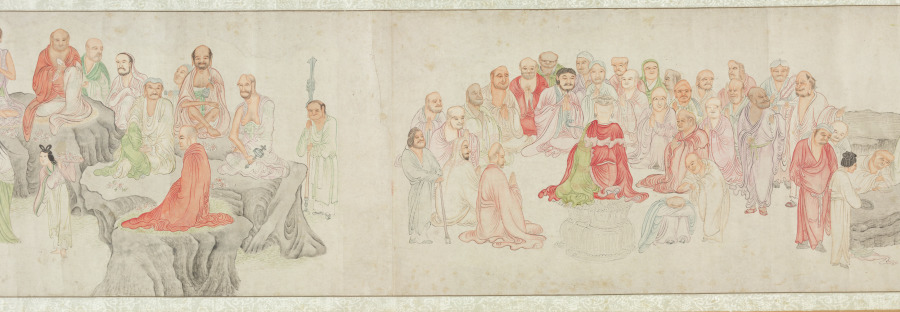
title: The Five Hundred Arhats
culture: China, Ming dynasty (1368–1644)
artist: Wu Bin (Chinese, active c. 1591–1626)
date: 1591–1626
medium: Handscroll; ink and color on paper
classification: Painting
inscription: 枝隱頭陀吳彬齋心拜寫 [印]吳彬之印; 文中父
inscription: 7 seals of Qianlong emperor (r. 1736–95): Gu xi tian zi 古希天子; Shou 壽; Qianlong jian shang 乾隆鑑賞; San xi tang jing jian xi 三希堂精鑑璽; Yi zi sun 宜子孫; Tai shang huang di zhi bao 太上皇帝之寳; Qian qing gong bao 乾清宮寶.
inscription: 6 seals of Cheng Qi 程琦 (1911–1988): Ke an geng zi wu shi yi hou suo de ming ji 可菴庚子五十以後所得名跡; 5 other Cheng Qi seals.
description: More than 66 feet long, this handscroll depicts 447 luohans, 72 attendants, and the bodhisattva of compassion at its very end. Luohans (arhats in Sanskrit), disciples of the Buddha and protectors of the Buddha’s law, possess supernatural powers and take on myriad external appearances. The amusing assortment of characters are engaged in an array of religious, secular, and miraculous activities. The painter used stylistic features borrowed from earlier artists, carefully controlled lines, and refined coloring. Wu Bin was a lay Buddhist and depicting this sort of image was part of a religious practice seeking understanding of the Buddha’s teaching.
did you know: Far advanced on the path to enlightenment, arhats have the capacity to tame tigers, free dragons, and to float on water or in the air.